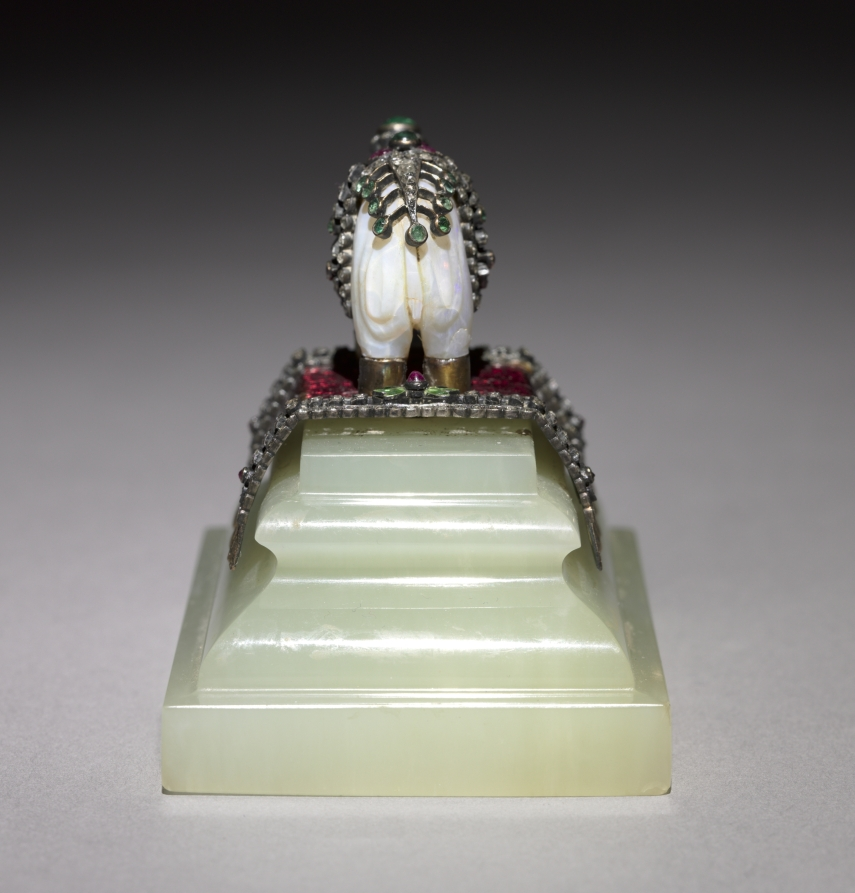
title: Elephant Bell Push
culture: Russia, St. Petersburg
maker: House of Fabergé (Russian, 1842–1918)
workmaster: Henrik Wigström (Russian, 1862–1923)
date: after 1903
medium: jade, gold, rubies, emeralds, diamonds, enamel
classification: Miscellaneous